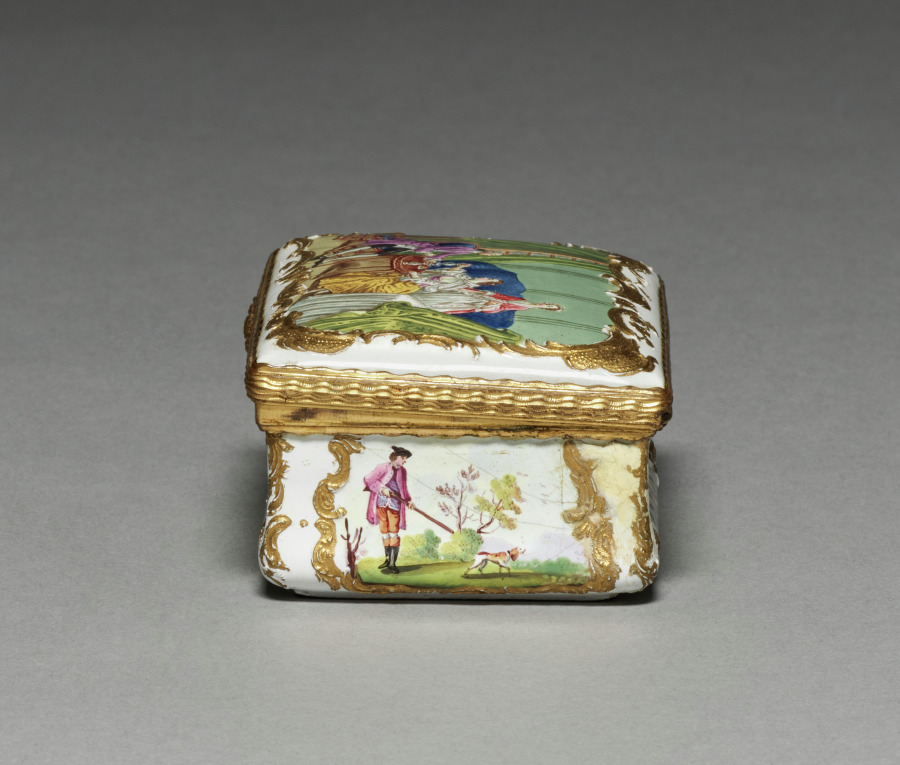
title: Box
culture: England, 18th century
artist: South Staffordshire Factory (British)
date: 1760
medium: enamel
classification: Enamel